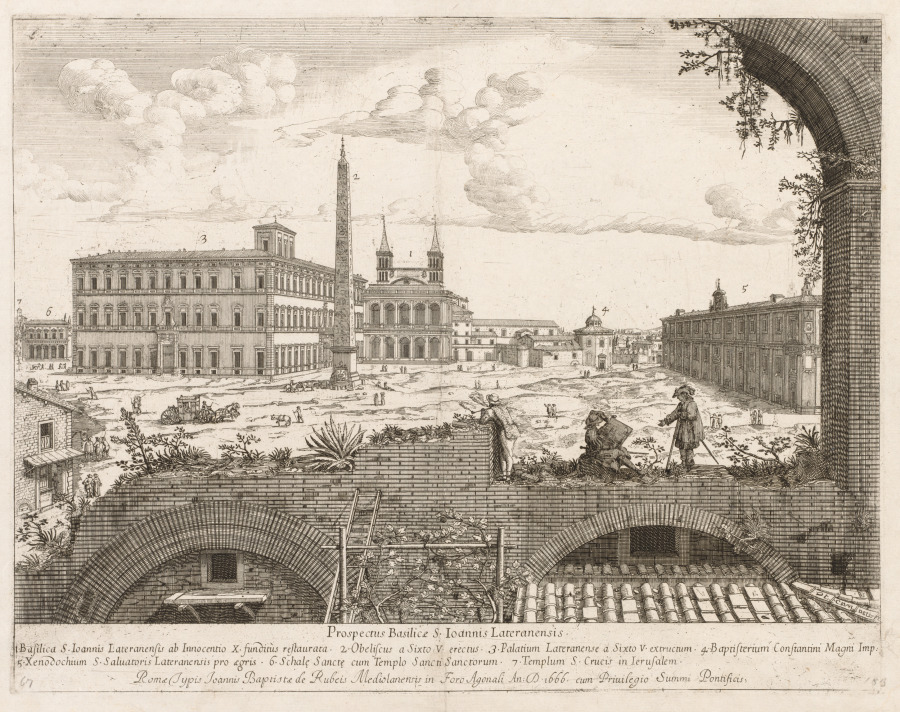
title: S. Giovanni in Laterano from "Prospectus Locurum Urbis Romae Insign[ium]"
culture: Flanders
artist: Lievin Cruyl (Flemish, c. 1640-c. 1720)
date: 1666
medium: etching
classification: Print